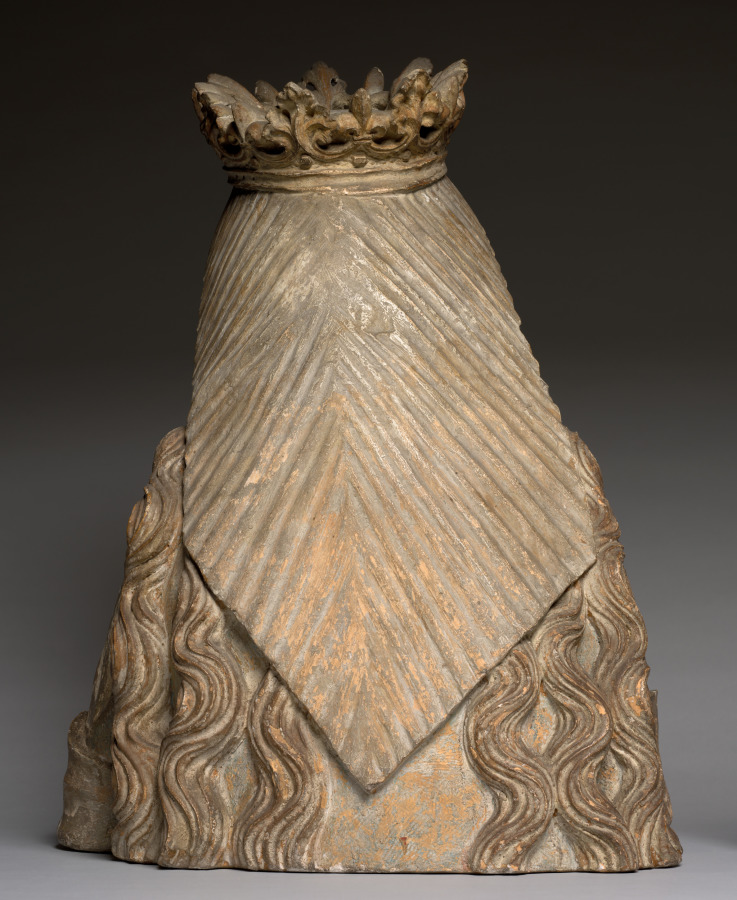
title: Bust called Anne de Bretagne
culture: France, 16th century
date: c. 1500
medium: stone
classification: Sculpture